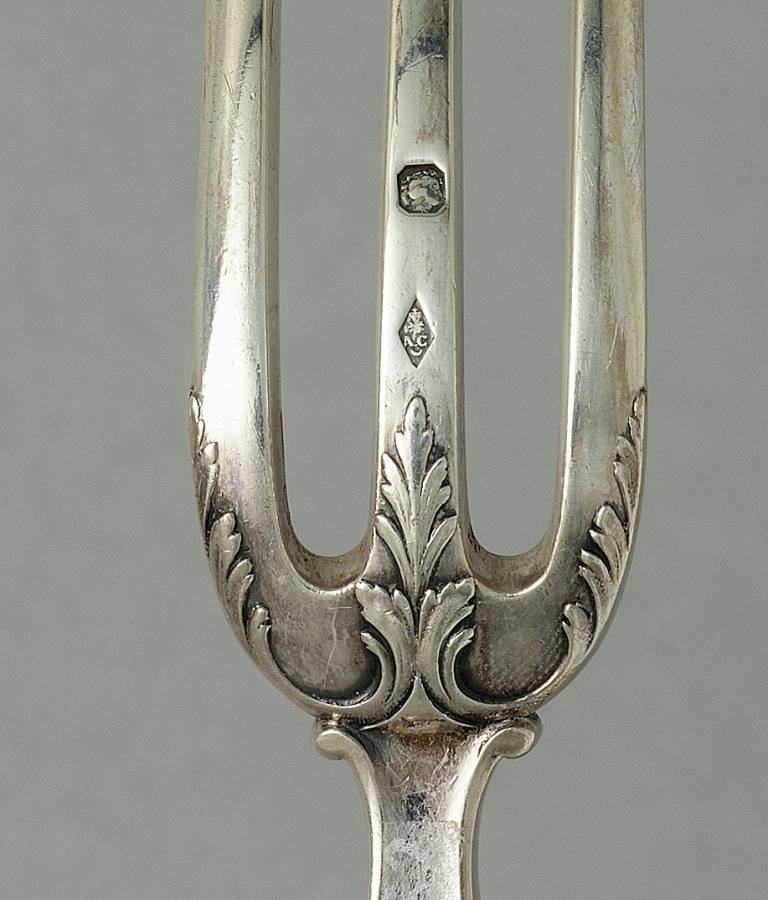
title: Dessert Fork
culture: France, 19th century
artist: Maison Cardeilhac (French)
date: c. 1880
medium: gilt silver and ivory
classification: Silver